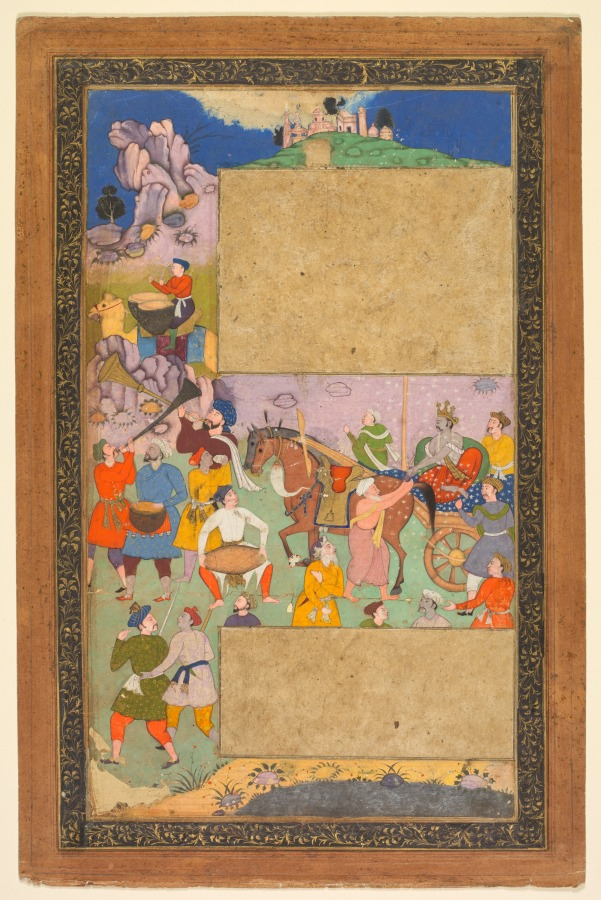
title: A charioteer riding through a rocky landscape with an entourage of footmen and musicians, page from a Razm-nama (Book of Wars) adapted from the Sanskrit Mahabharata and translated into Persian by Mir Ghiyath al-Din Ali Qazvini, known as Naqib Khan (Persian, d. 1614)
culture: India, Mughal, 17th century; made for Abd al-Rahim the Khan Khanan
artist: attributed to Yusuf Ali (Indian, active early 1600s)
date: 1616–17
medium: Gum tempera, ink, and gold on paper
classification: Painting